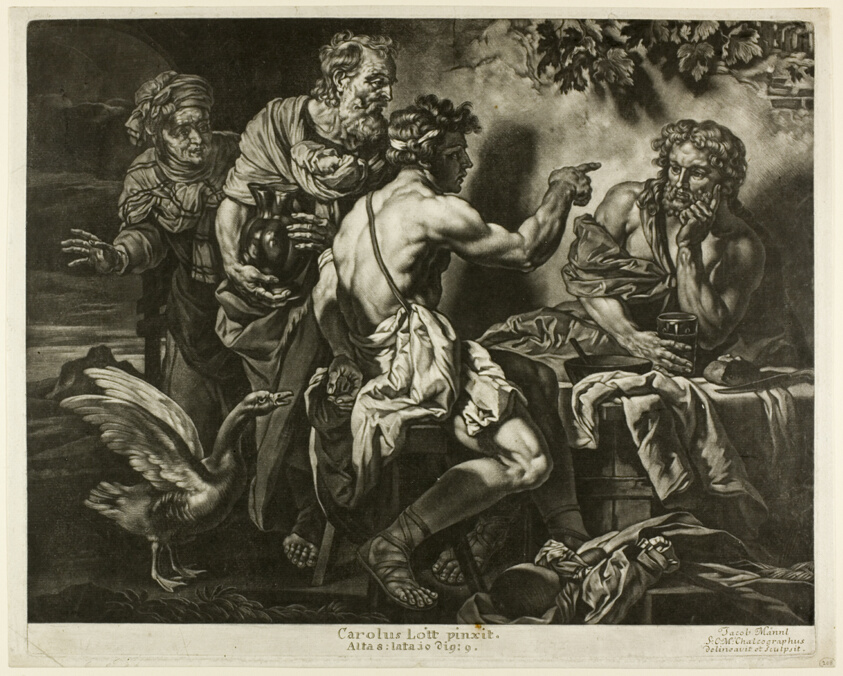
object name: Print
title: Jupiter and Mercury with Philemon and Baucis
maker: Jacob Männl (Austrian, 1654-1712); after Johann Carl Loth (German, 1632-1698)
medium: Mezzotint in black on paper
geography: Austria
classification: mezzotint; print; prints and drawing